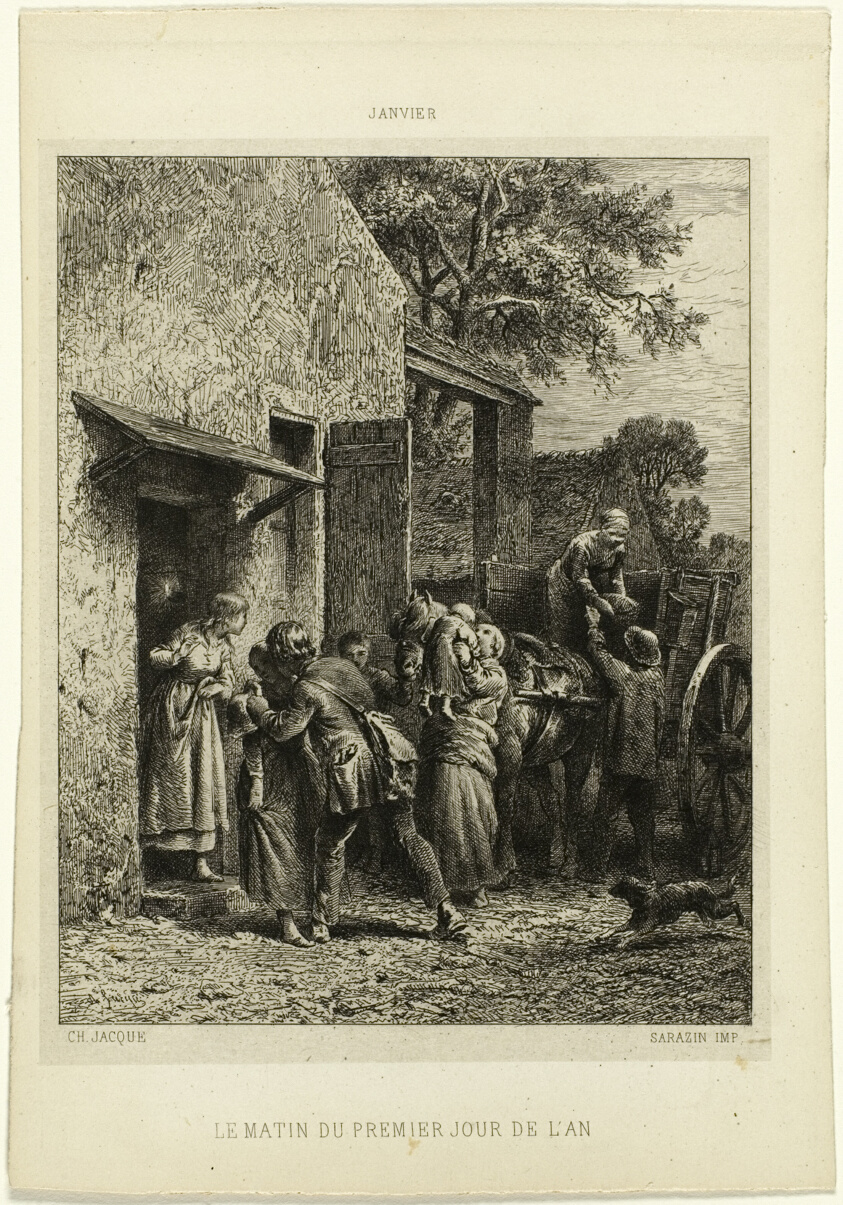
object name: Print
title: The Morning of the First Day of the Year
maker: Charles Émile Jacque (French, 1813-1894); printed by Sarazin (French, 19th century)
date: c. 1864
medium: Etching, engraving, and drypoint on light gray China paper laid down on ivory wove paper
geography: France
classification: etching; print; prints and drawing